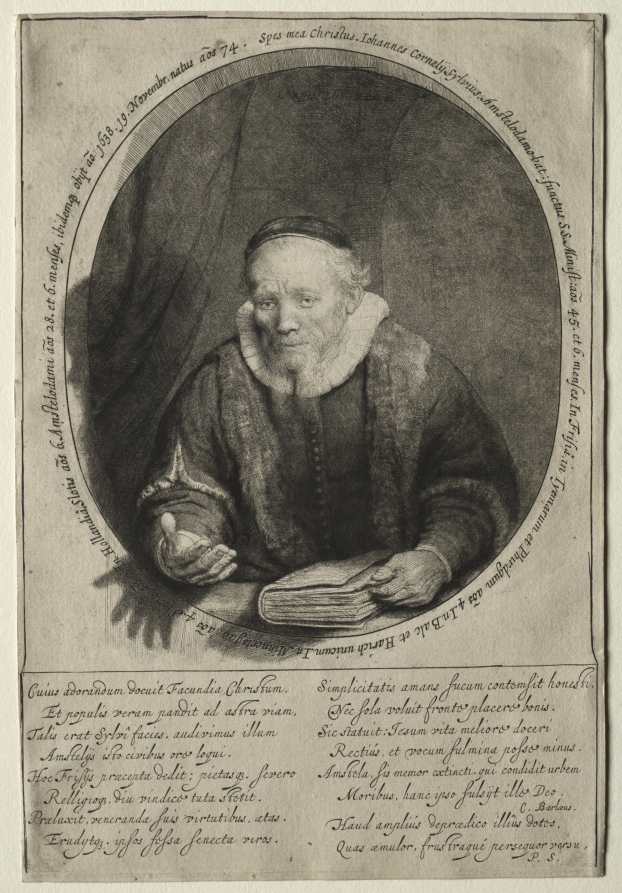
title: Jan Cornelis Sylvius, Preacher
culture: Netherlands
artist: Rembrandt van Rijn (Dutch, 1606–1669)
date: 1646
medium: etching and drypoint with sulphur tint and touches of gray wash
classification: Print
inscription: around oval, in plate: Spes mea Christus. Iohannes Cornelÿ Sylvius. Amstelodamo-bat: functus S S.Minist:aõs 45.et 6.menses. In Frisiâ. in Tyemarum et Phirdgum aõs 4. In Balco et Harich unicum. In Minnerts gae aõs 4.Slotis aõs 2. In Hollandiâ, Slotis aõs. Amstelodami aõs 28. et 6.menses, ibidemque obÿt ã o 1638.19. Novembr. natus aõs 74. ; upper center, in plate: Rembrandt f. 1646 ; in bottom quarter, in plate: Cuius adorandum docuit Facundia Christum, / Et populis veram pandit ad astra viam. / Talis erat Sylvî facies. audivimus illum / Amstelÿs is[?]o civibus ora loqui. / Hoc Frisÿs praecepta dedit; pietasque. fevero / Relligioque. diu vindica tuta s[?]it. / Praeluscit, veneranda fuis virtutibus, atas. / Erudytque. ipsos fossa senecta viros. / Simplicitatis amans fucum contomsit honesti, / Nec sola voluit fronto placero bonis. / Sic statuit: Fesum vita melioro doceri / Rectius, et vocum fulmina posso minus. / Amstola, sis memor extincti. qui condidit urbem / Moribus, hanc urso fulsÿt illo Deo. / C. Barlaeus. / Haud amplius depraedico illiûs dotis. / Auas aemulor, frustraque persequor verso. / P. S. ; VERSO, upper left, in graphite: S. x. n. ; lower center, in graphite: B. 280. ; lower right, in graphite: MK